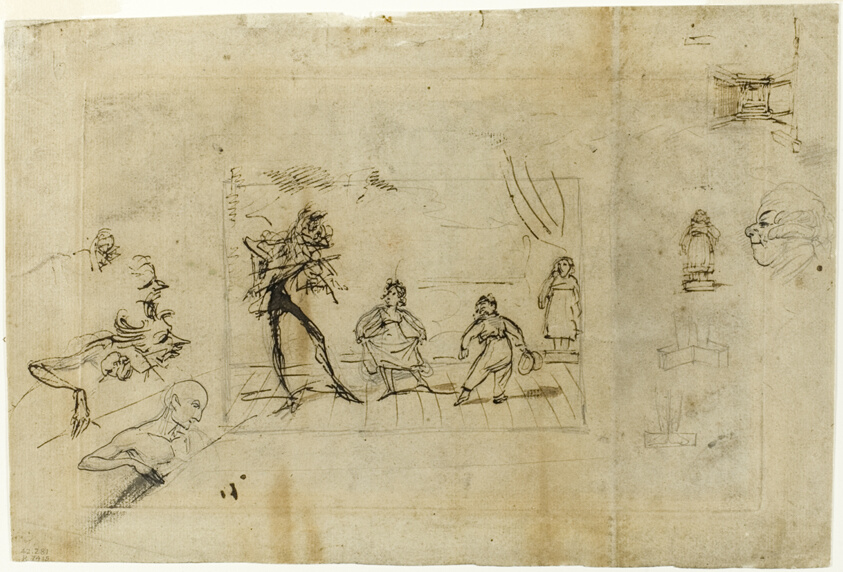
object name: Drawing and Watercolor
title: Study for the The Dancing Lesson, part 2: The Minuet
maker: George Cruikshank (English, 1792-1878)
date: c.1835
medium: Pen and brown ink over graphite, on tan laid paper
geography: England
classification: pen and ink drawings; drawings (visual works); prints and drawing